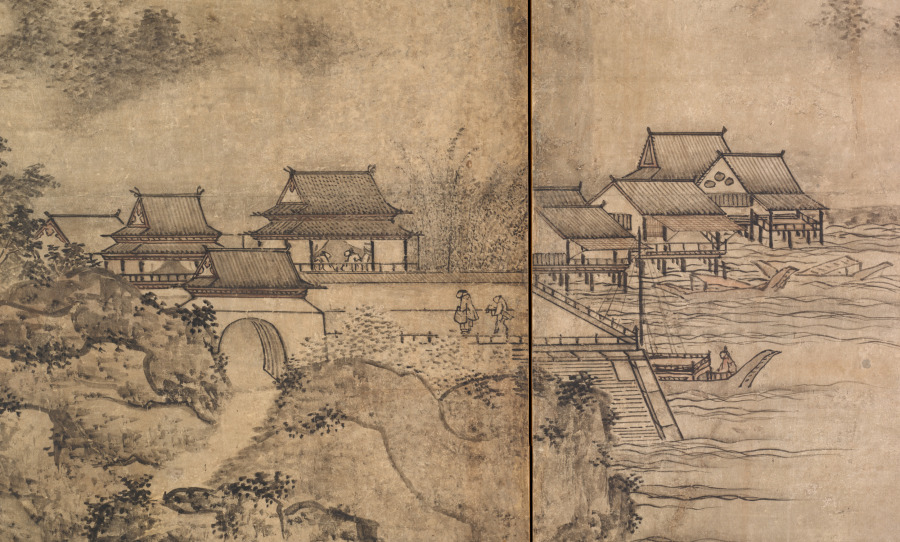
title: Landscape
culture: Japan, Muromachi period (1392–1573)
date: 1550–99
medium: One of a pair of six-panel folding screens; ink and color on paper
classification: Painting